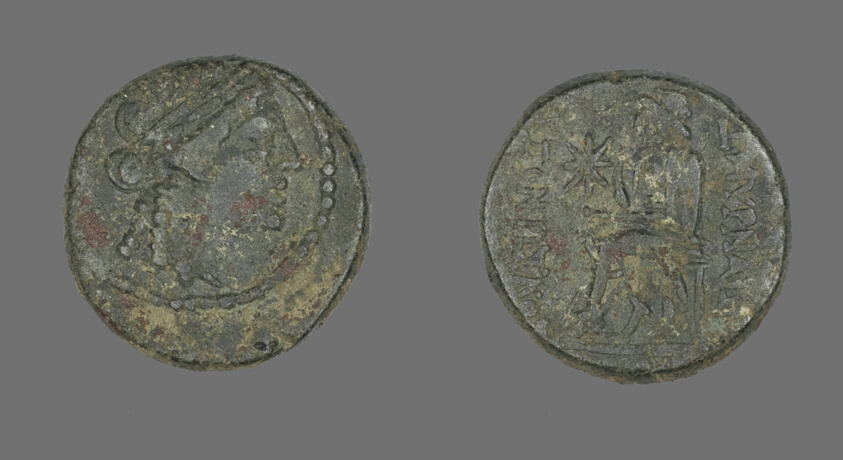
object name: Coin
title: Coin Depicting the God Apollo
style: greek, ancient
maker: Greek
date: 2nd-1st century BCE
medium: Bronze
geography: Ancient Greece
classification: coin; ancient art